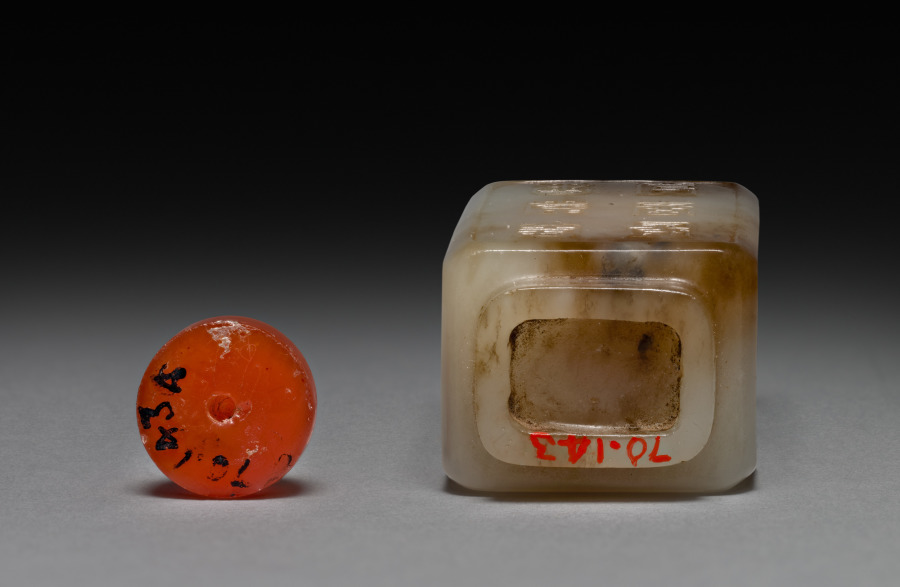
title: Snuff Bottle with Stopper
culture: China, Qing dynasty (1644–1911), Qianlong reign (1736–95)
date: 1736–95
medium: jade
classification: Jade